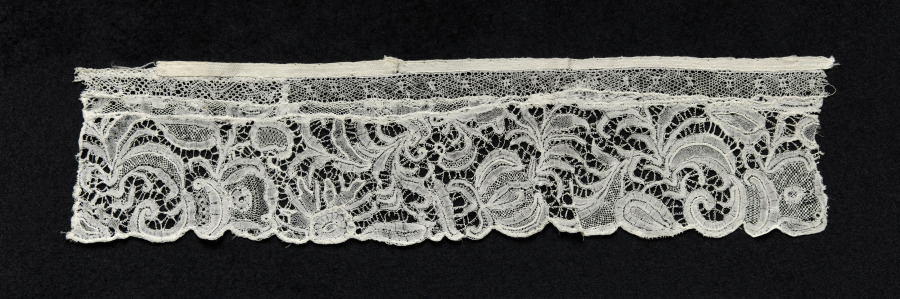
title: Lace Cuff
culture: Belgium, Brussels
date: early 1700s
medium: Bobbin lace (Point d'Angleterre)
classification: Lace